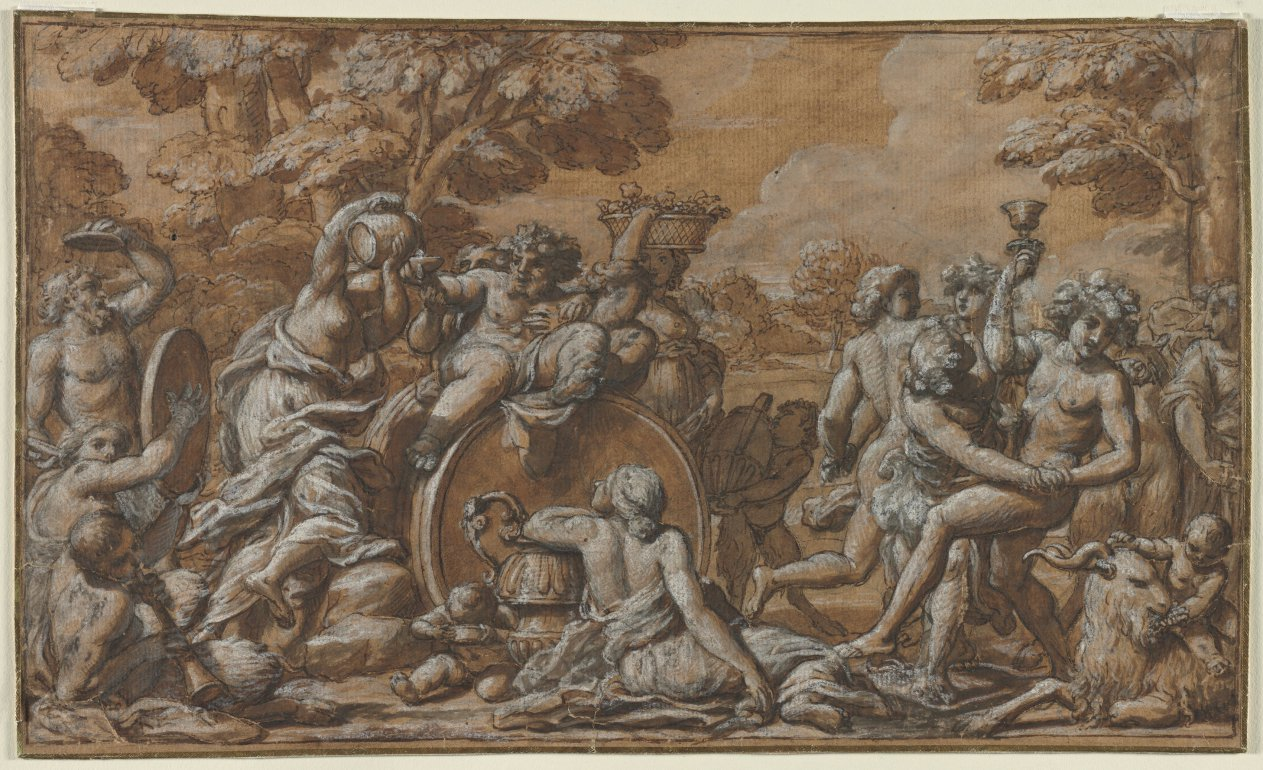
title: Bacchanal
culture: Italy, 17th century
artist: circle of Pietro da Cortona (Italian, 1596–1669)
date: mid-1600s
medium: pen and brown ink and brush and brown wash over black chalk, heightened with white gouache; incised, framing lines in brown ink over traces of black chalk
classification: Drawing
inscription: VERSO OF SECONDARY SUPPORT, upper center, in graphite: 22 [underlined] , lower left, in brown ink: 15.t [crossed out in graphite] ; lower right, in graphite: Copy after Pal. Barberini ? / J. Sch / c f Ciro Ferri FR ; lower right, in graphite: P.da Cortona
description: Here, a bacchanalia is in full swing with its required cast of characters: Bacchus, Roman god of wine, at right; Silenus, atop the wine barrel, always ready for another glass; and numerous bacchants consisting of maenads, satyrs, musicians, children, and a goat, all within an Italian landscape. This drawing may have been a design for a fresco or painting. Depictions of bacchanalia were often meant for dining spaces, where the elite of society could playfully mirror the revelries portrayed in their own enjoyment of food and wine.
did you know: Goats were commonly associated with sinful behavior, making them a common element in Bacchic scenes.